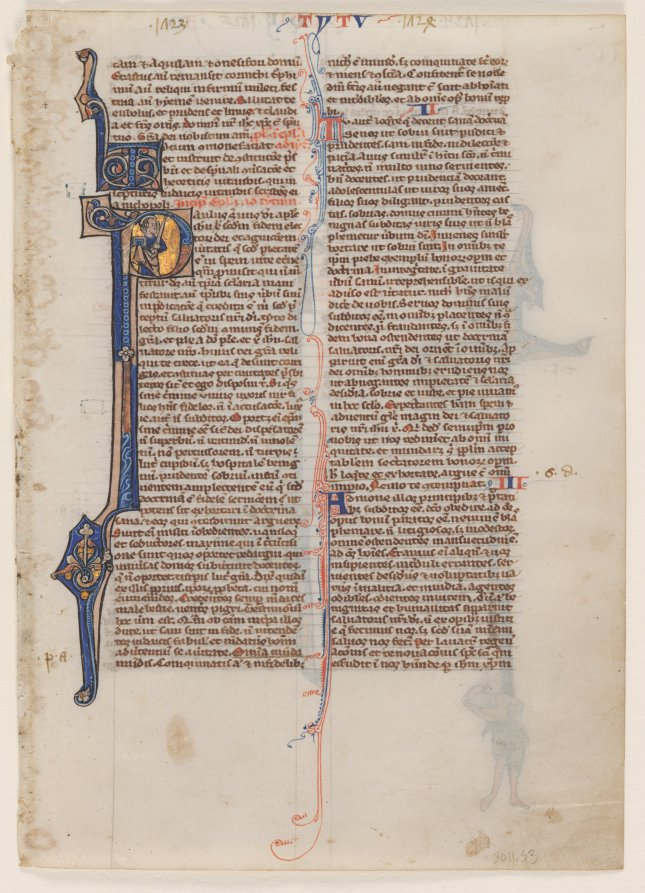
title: Leaf from a Latin Bible: Initial P: St. Paul with a Sword and a Book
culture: England, Oxford, 13th century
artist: circle or workshop of William de Brailes (English, active c. 1230)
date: c. 1230–40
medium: ink, tempera, and gold on vellum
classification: Manuscript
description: Circle of William de Brailes (England, Oxford) Single Leaf from a Latin Bible: Initial P: St. Paul Holding a Sword and a Book and Initial M: A Jew Discoursing with a King, about 1230-40 Ink, tempera, and gold on vellum The Jeanne Miles Blackburn Collection [Cat. no. 4] Few English illuminators are actually known by name. William de Brailes has been identified from documents that refer to his presence in Oxford. Moreover, his signature appears on one of seven detached psalter leaves now divided between Cambridge (Fitzwilliam Museum) and New York (Pierpont Morgan Library). It seems that several artists were working in the "de Brailes style," but it is not known whether these were organized members of his workshop or simply illuminators in the de Brailes circle. Typical of the de Brailes workshop is the use of drolleries (playful or sometimes comic figures that inhabit marginalia or initials). One such drollery, seen here, occupies the lower portion of the initial "P" introducing St. Paul's Epistle to Philemon. Wearing a scholar's cap, the drollery is contorted in pose, as if supporting the initial itself. This initial comes from a one-volume Bible, conveniently sized for portability and study. Such books were typically the products of lay workshops in academic towns like Oxford, Paris, and Bologna.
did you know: The initials in the margin, T.F. and P.A. are part of a unique system used by the Carthusians monks and indicate that this bible was likely used in a monastery.